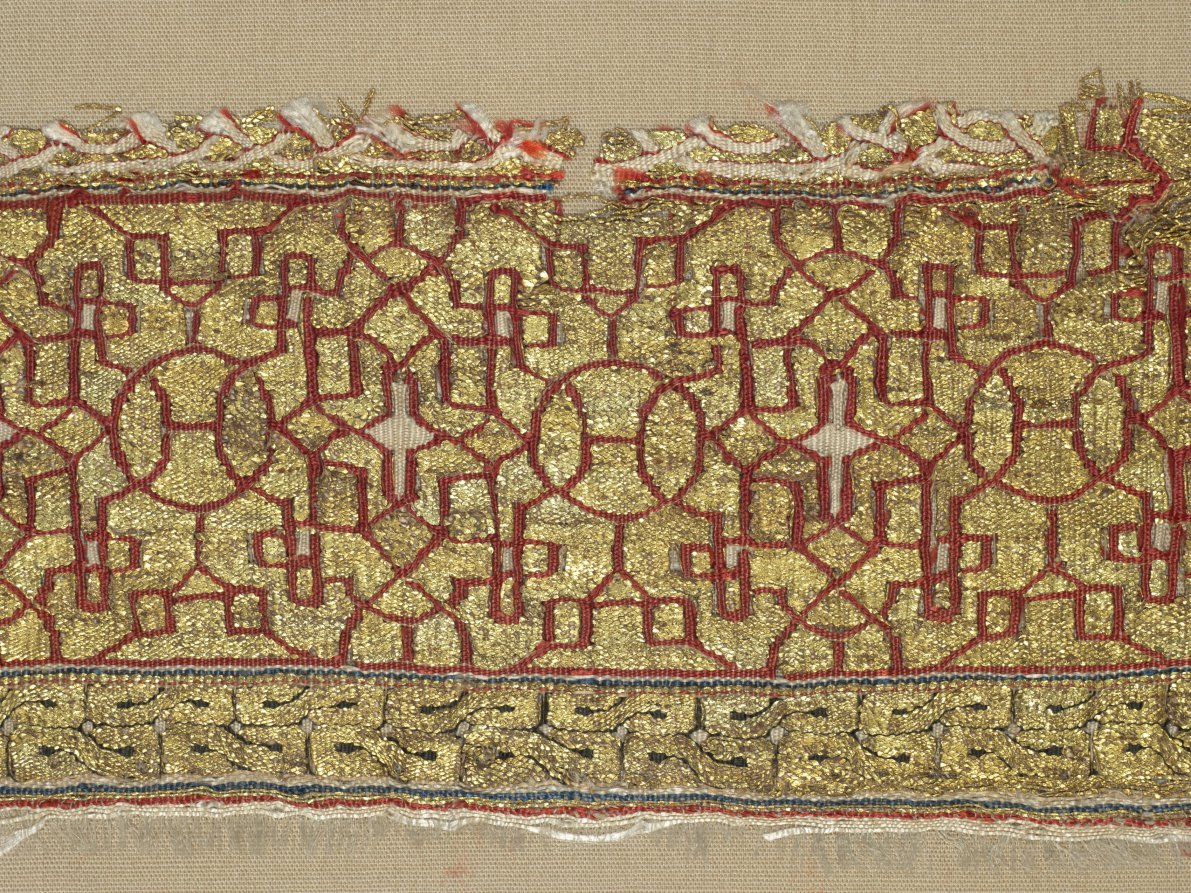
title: Guilloche band, from a dalmatic of San Valero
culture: Spain, probably Almeria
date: 1200s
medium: tapestry weave: silk and gold thread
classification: Textile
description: Rarely do medieval silks convey their original luxurious quality with such brilliant gold thread. This fragment is said to have been among relics of Saint Valerio from Lérida Cathedral (in northeast Spain, near Barcelona). An elegant geometric tracery in crimson silk decorates the gold-thread ground, bordered above by four interlacing strands in ivory silk and below by two rows of "figure 8s" woven with gold thread and black silk outlines.